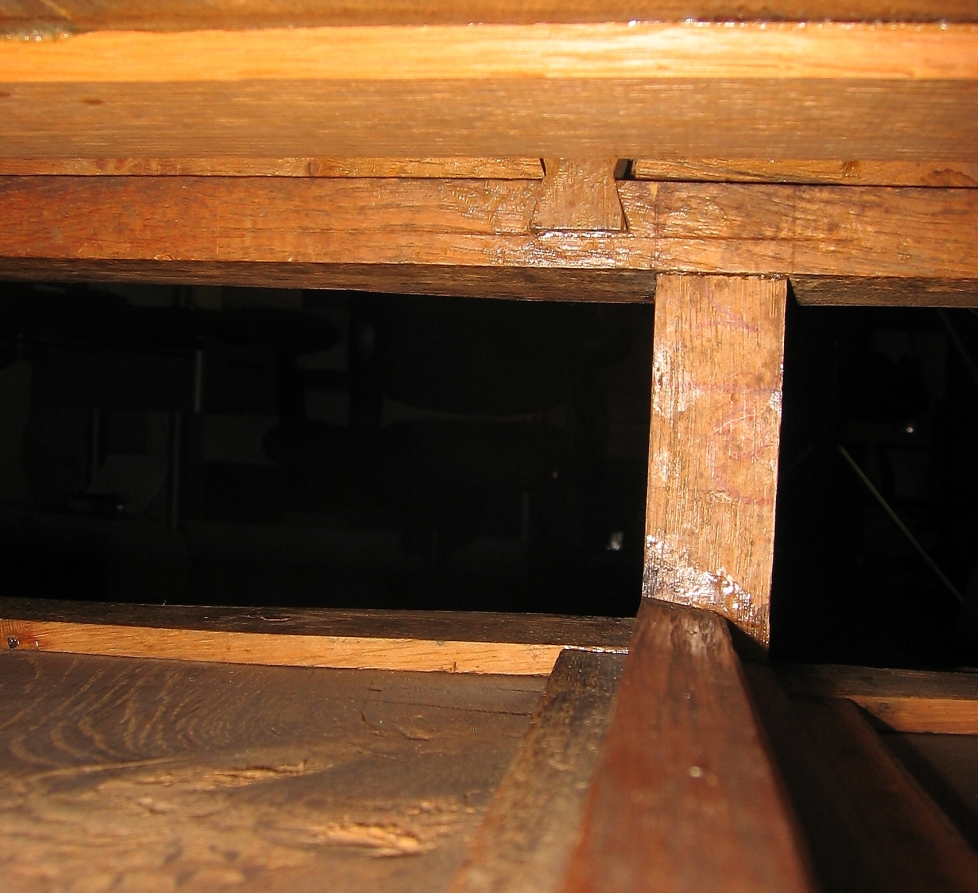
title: Table Desk (Bureau Plat)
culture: France, 18th century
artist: Bernard II van Riesen Burgh (Dutch, 1766)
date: c. 1750– 1760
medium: wood marquetry with gilt bronze mounts, leather top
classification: Furniture and woodwork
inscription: signed three times on bottom edge of apron: B. V. R. B.